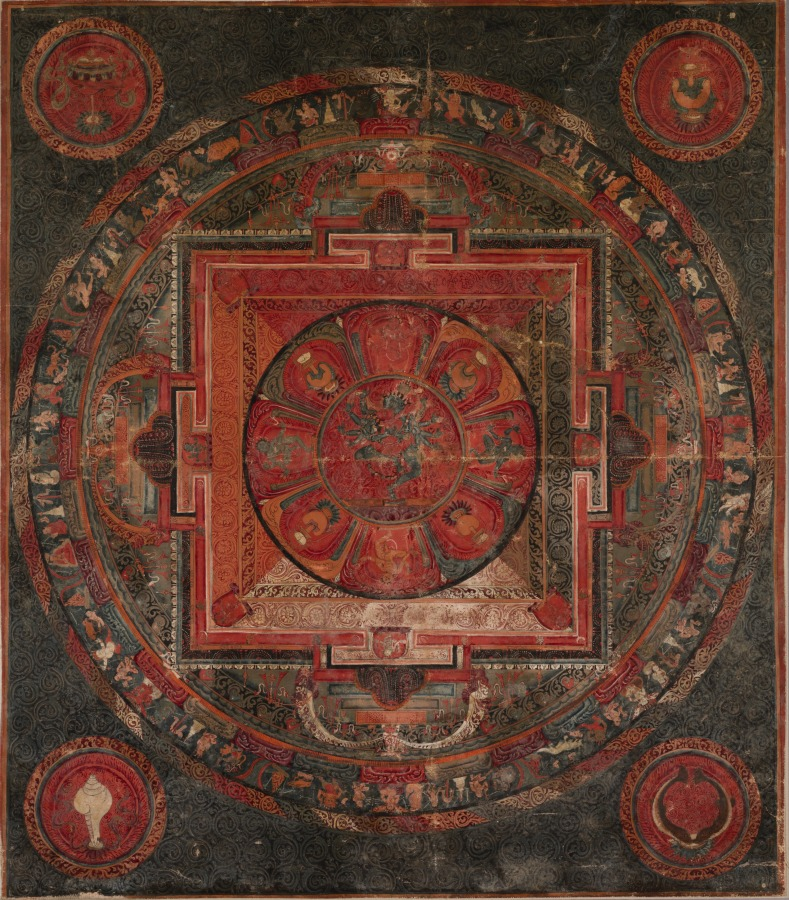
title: Mandala of Chakrasamvara and Vajravarahi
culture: Nepal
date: late 1400s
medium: Gum tempera on cloth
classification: Painting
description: A mandala is a two-dimensional diagram of a palace-like structure, viewed from above. This mandala depicts the abode of a 4-headed, 12-armed figure who personifies a major tantric Buddhist text, the Chakrasamvara-tantra. He dances in the bliss of sexual union with his consort, the red Vajravarahi, in the central circle, which is equivalent to the penthouse of their palace. Through guided meditation, practitioners can visualize entering through each of the four gates to experience the beauty of the enlightened realm. The outermost ring of cremation grounds indicates that one must overcome fear of death before reaching the realm of enlightenment.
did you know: In the corners are four auspicious symbols (clockwise from top left): umbrella (an emblem of royalty), pot (referencing abundance), pair of fish (symbol of productivity), and conch shell (indicating the eradication of obstacles).